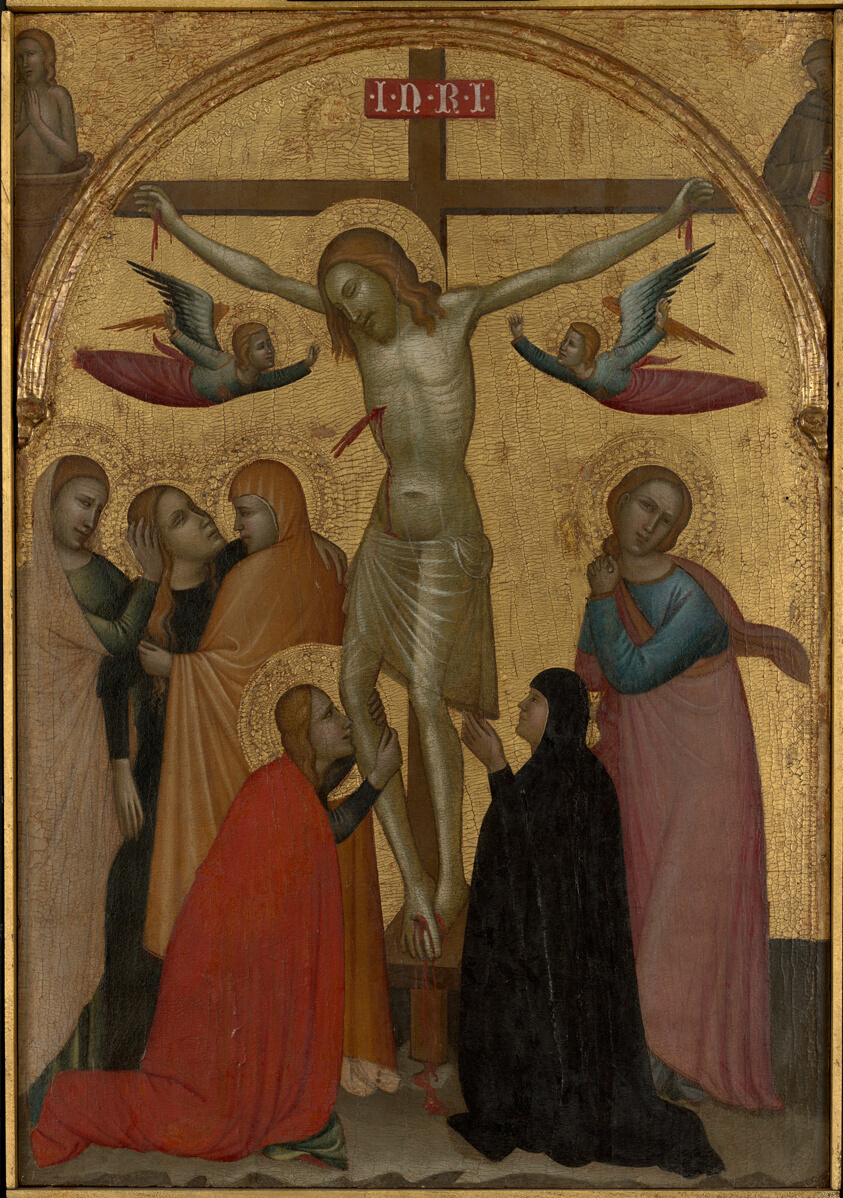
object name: Painting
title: The Crucifixion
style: 18th Century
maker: Francescuccio Ghissi (Italian, active 1359–1395)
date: c. 1370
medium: Tempera on panel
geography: Italy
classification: tempera; paint; Italian; painting; european painting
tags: crucifixions, angels, biblical, blood, Christian subjects, Christianity, death, figures, gold (color), Jesus, Mourning, religion, religious figures, religious scenes, saints, Virgin Mary, women, Century of Progress, world's fairs, Chicago World's Fairs